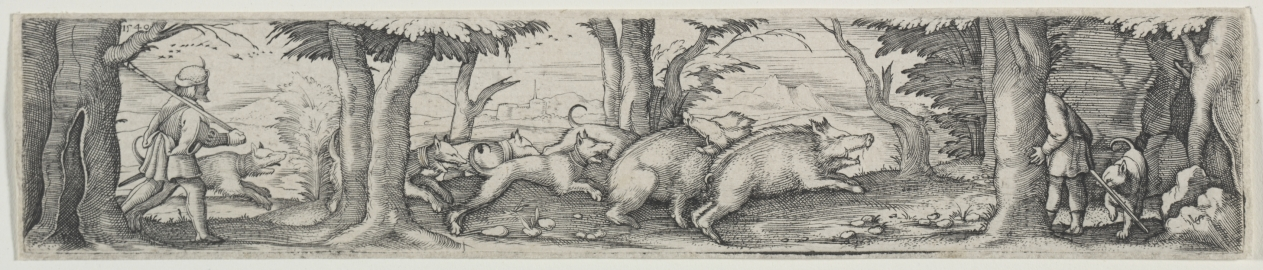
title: Boar Hunt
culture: Germany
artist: Virgil Solis (German, 1514–1562)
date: 1540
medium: engraving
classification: Print